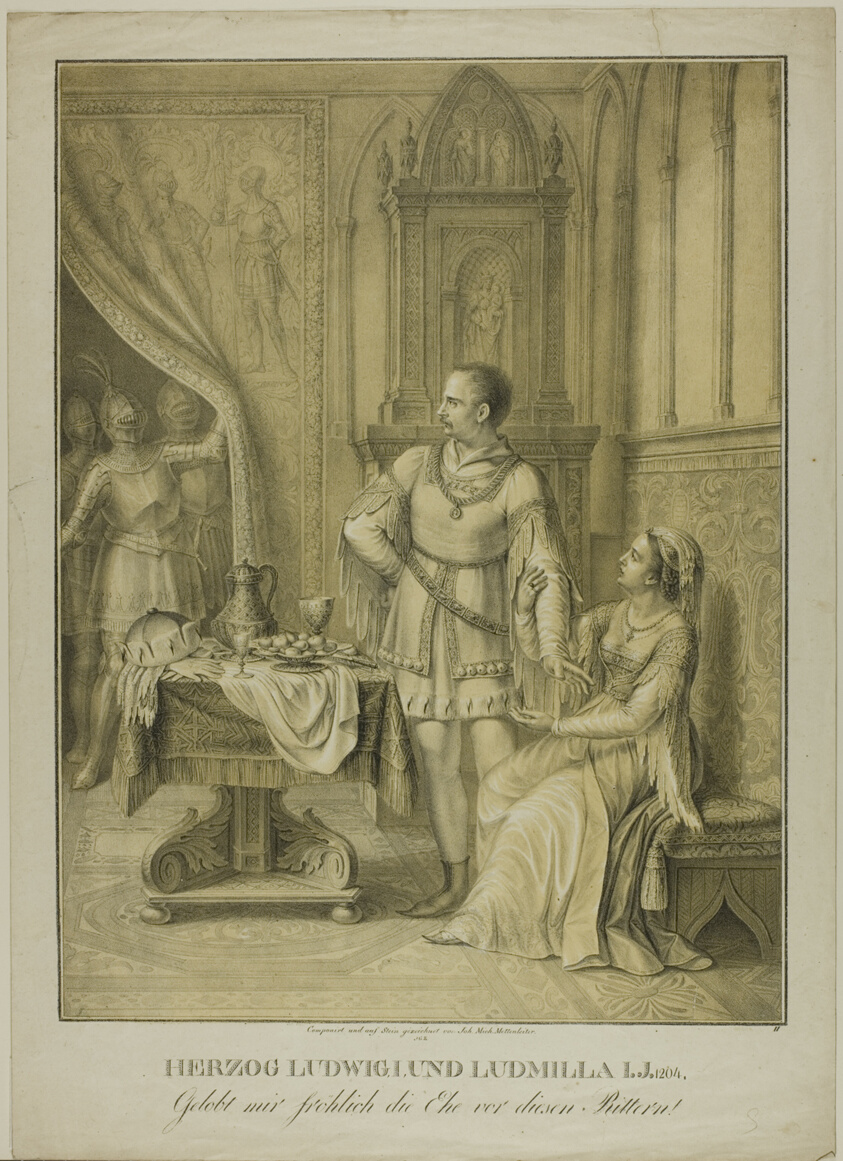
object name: Print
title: Herzog Ludwig I and Ludmilla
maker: Johann Michael Mettenleiter (German, 1765-1853)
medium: Lithograph on paper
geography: Germany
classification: lithograph; print; prints and drawing